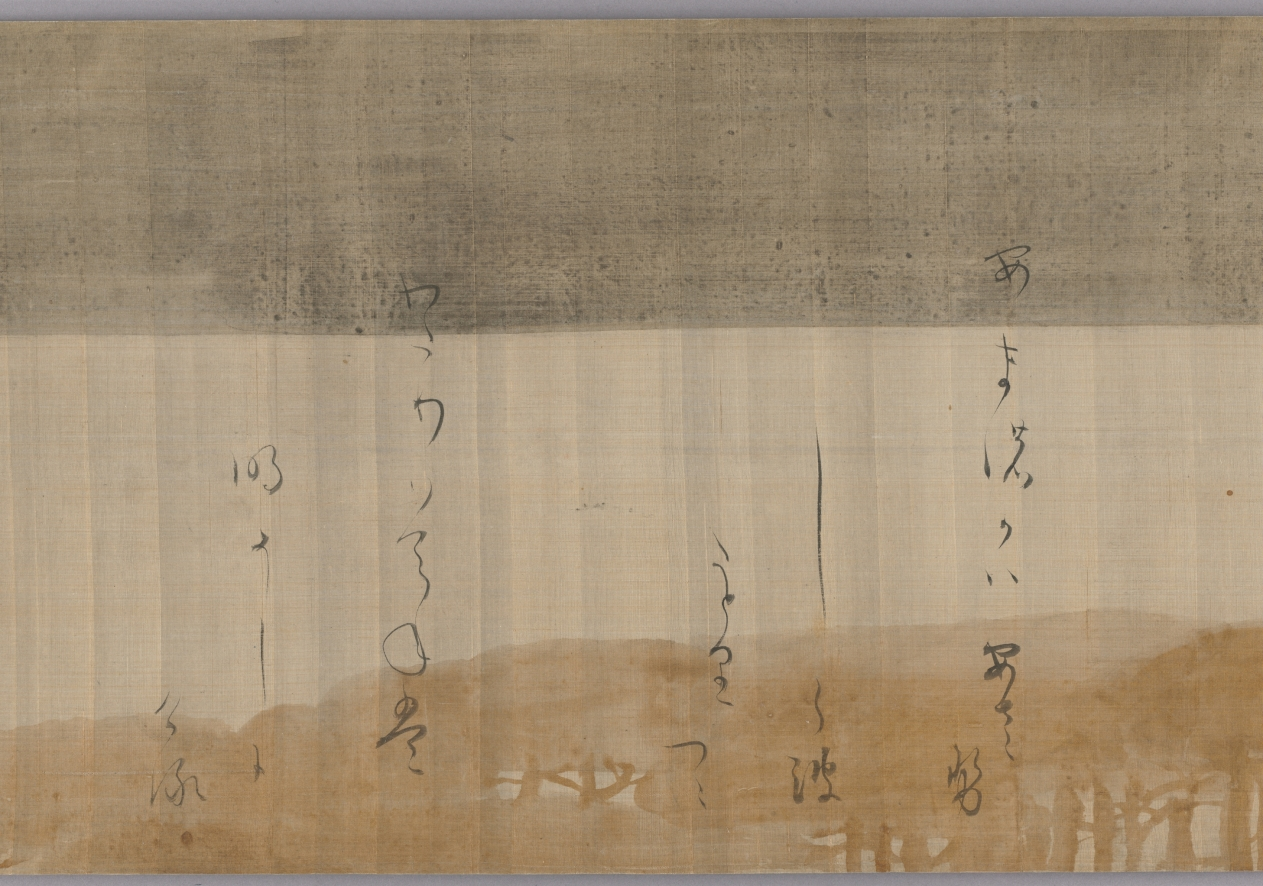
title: Selections from the Collection of Japanese Poems from Ancient and Modern Times (Kokin wakashū) with Design of Pines Along the Shore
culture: Japan, Momoyama period (1573-1615) to Edo period (1615-1858)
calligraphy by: Hon'ami Kōetsu (Japanese, 1558–1637)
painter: attributed to Tawaraya Sōtatsu (Japanese, c. 1570–c. 1640)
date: 1600s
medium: handscroll; ink on silk with gold and silver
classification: Calligraphy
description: The calligrapher and craftsman Hon’ami Kōetsu frequently collaborated with Tawaraya Sōtatsu, a painter who ran a studio that produced fans and screens. Sōtatsu’s work featured abstracted and flattened shapes, fields of color and gold, and asymmetry. In particular, motifs that appeared in small scale, such as flora and fauna, in early decorated Japanese papers were painted in a larger scale—blown up as if seen under a magnifying glass. For this handscroll, Kōetsu brushed poems from the autumn section of a poetry anthology onto silk with a landscape of pines in gold and silver likely painted by Sōtatsu.